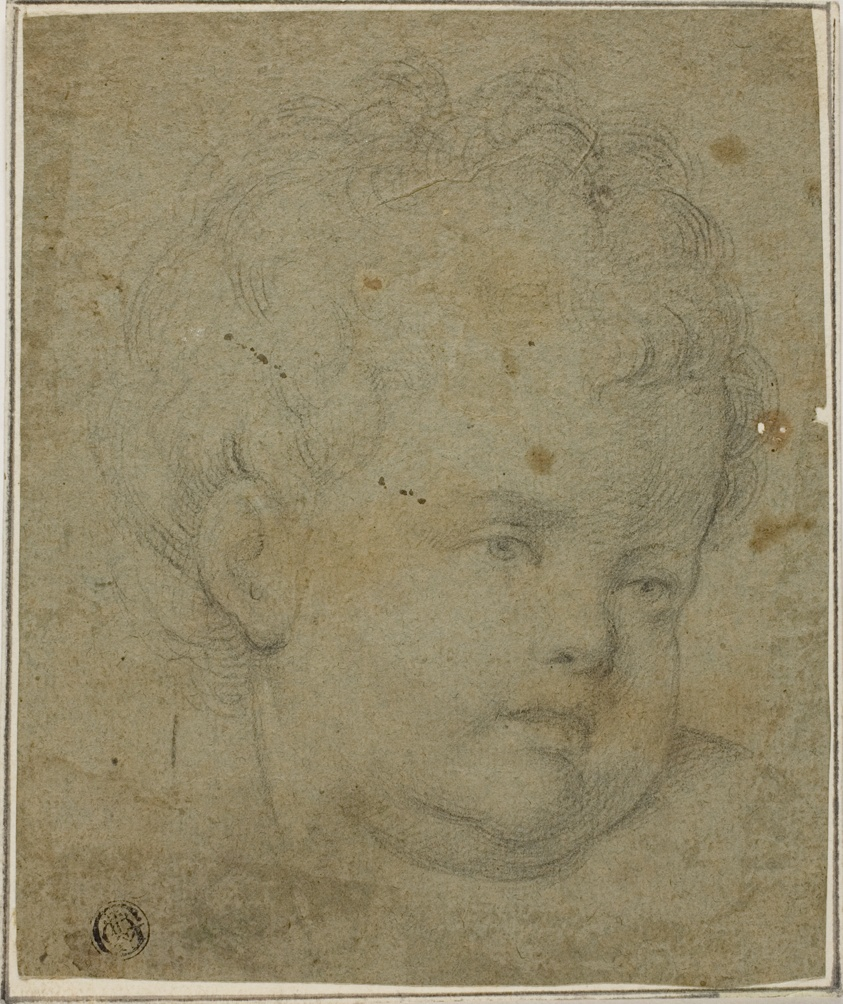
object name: Drawing and Watercolor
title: Child's Head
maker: Giovanni Battista Caracciolo (Italian, 1578-1635)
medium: Black chalk on blue gray laid paper, laid down on ivory laid paper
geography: Italy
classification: graphite; drawings (visual works); prints and drawing